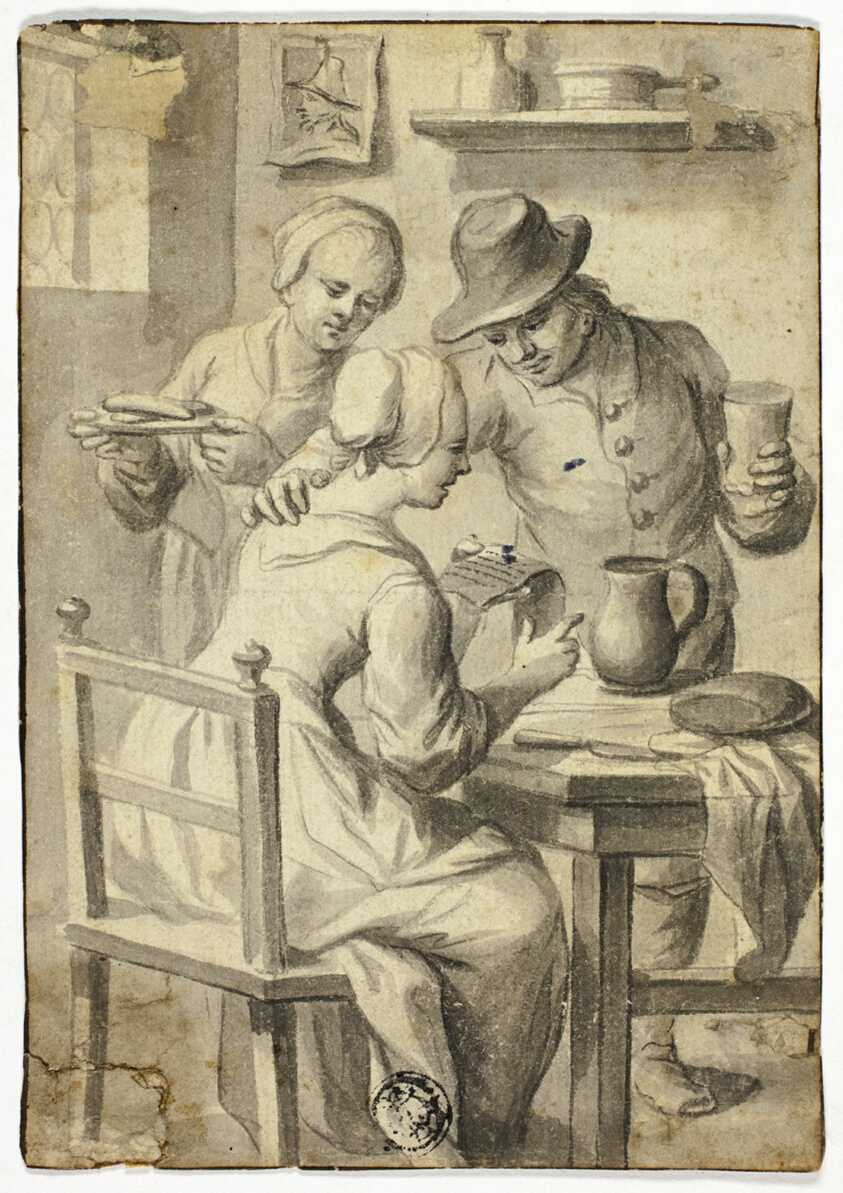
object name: Drawing and Watercolor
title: Woman Reading at Table While Man and Woman Listen In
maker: Egbert van Heemskerk, the Elder; Dutch, c. 1634-1704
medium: Brush and gray wash over black chalk, on ivory laid paper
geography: Holland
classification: ink or chalk wash; drawings (visual works); prints and drawing